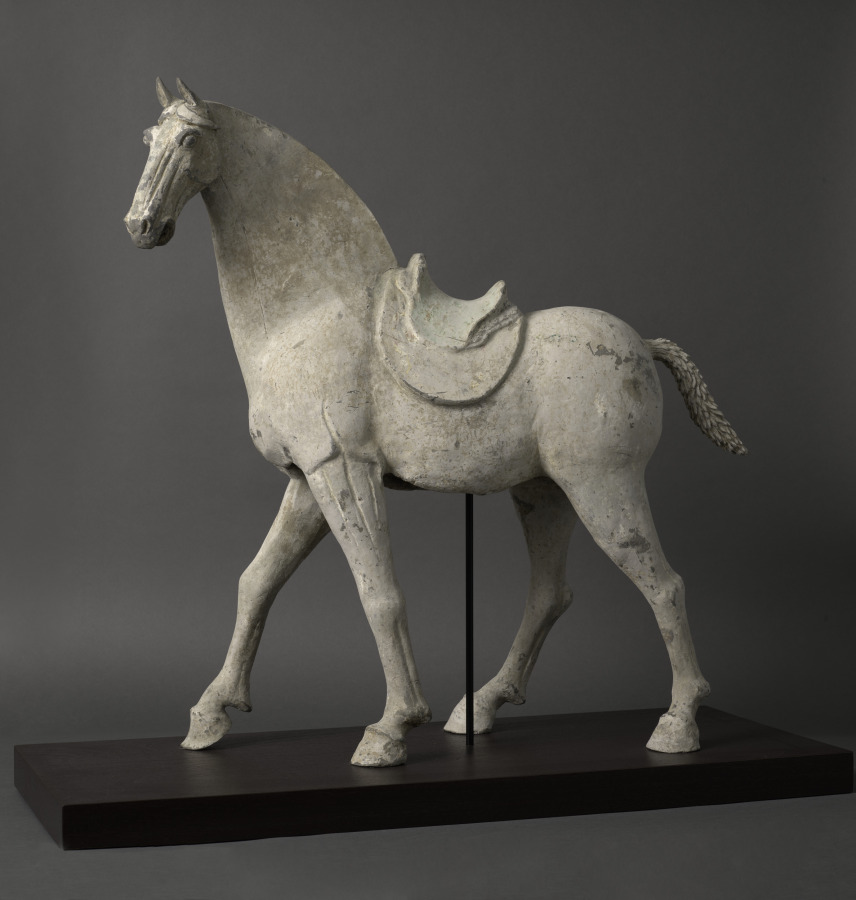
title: A Large Painted Striding Horse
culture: China, Tang dynasty (618–907)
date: 700–800s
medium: Pottery with white slip and mineral colors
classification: Ceramic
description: Horses were symbols of status and power in ancient China, used for military operations, mobility, and entertainment for the elite. Around the second century BCE onward, pottery horses began to be placed in tombs as status symbols and companions of the deceased in the afterworld. This horse is harnessed with a saddle and is exceptionally large. It presents a well-bred specimen that strides forcefully ahead.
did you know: A groove runs over the horse’s neck from its ears to the saddle, indicating that its mane and tail were once filled with real horsehair to render the sculpture more realistic.